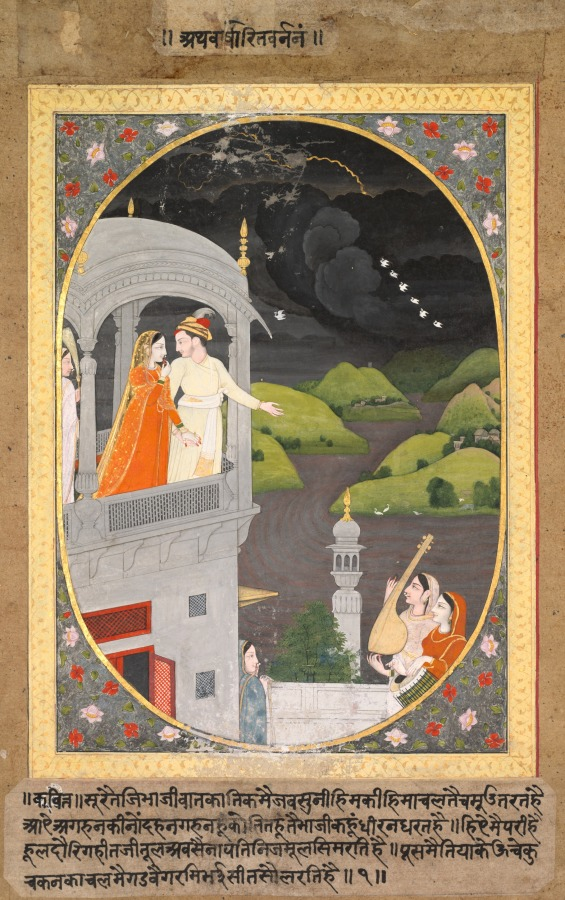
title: Royal lovers watching rain clouds: The month of Bhadon, from a Barahmasa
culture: Northern India, Pahari kingdoms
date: c. 1790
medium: Gum tempera, ink, and gold on paper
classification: Painting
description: Barahmasa means Twelve Months, and this painting came from a series that depicts scenes associated with each month of the Hindu calendar. Bhadon corresponds to a month straddling August and September. It is the middle of the monsoon season when rivers are swollen and continual rainstorms prevent travel and warfare. For this reason, men remain at home, and Bhadon is famed as a month for lovemaking.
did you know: The oval format became popular after the 1760s with the expansion of British presence in India.